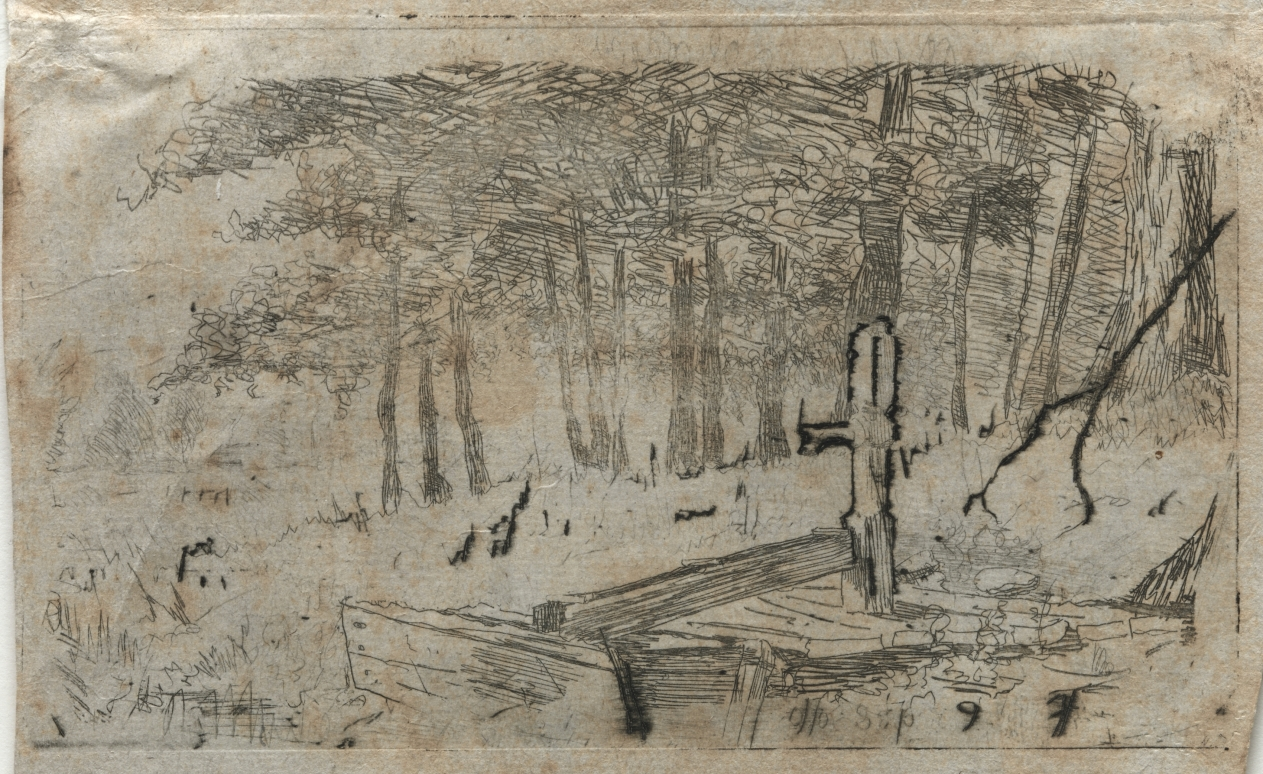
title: Small Study of Trees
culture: America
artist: Otto H. Bacher (American, 1856–1909)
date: 19th-20th century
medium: etching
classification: Print